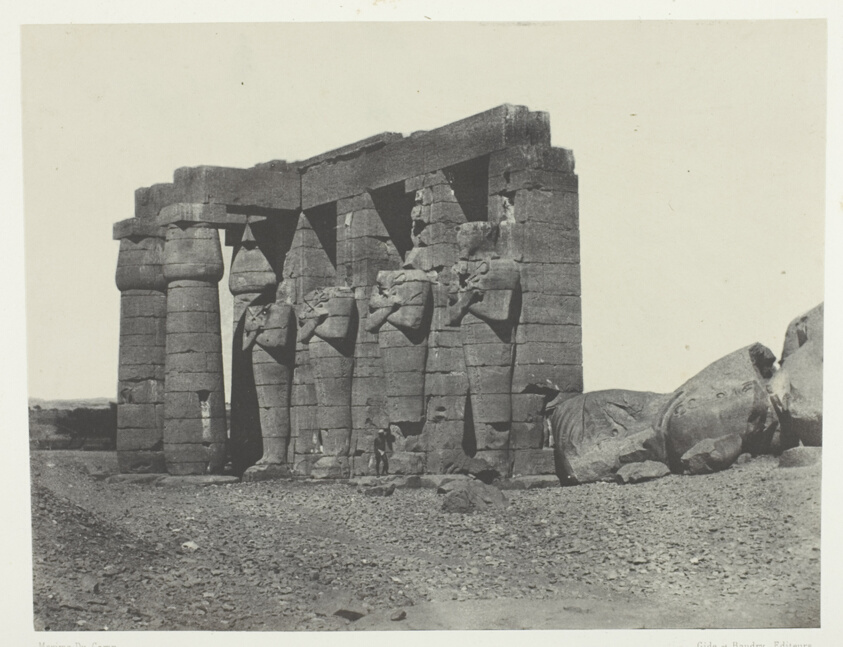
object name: Photograph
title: Gournah, Pérystyle du Tombeau d'Osymandias (Ramesseum Occidental); Thèbes, plate 59 from the album "Egypte, Nubie, Palestine et Syrie" (1852)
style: 19th century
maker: Maxime Du Camp (French, 1822–1894)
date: 1849/51, printed 1852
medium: Salted paper print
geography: France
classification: salted paper print; photographic process; photography; photograph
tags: Collected by Hugh Edwards, Egypte, Nubie, Palestine et Syrie